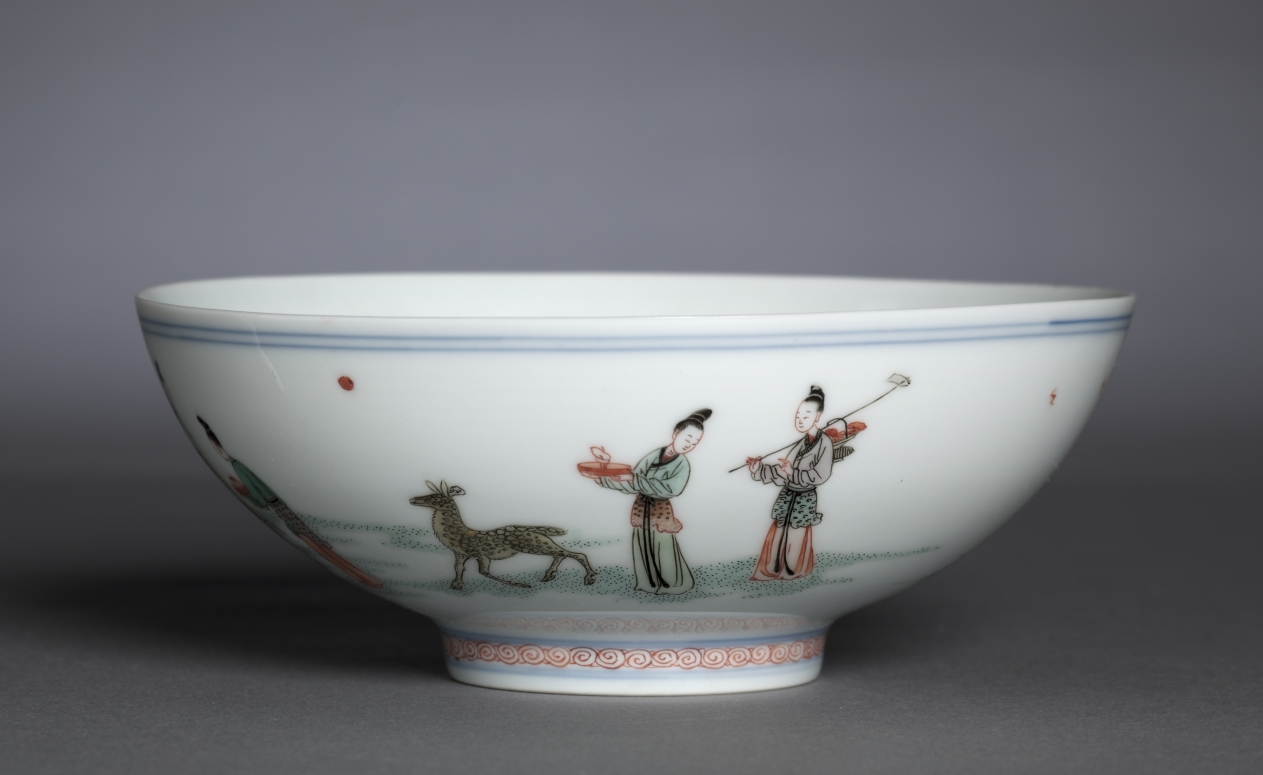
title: Bowl with Xiwangmu and Attendants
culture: China, Jiangxi province, Jingdezhen, Qing dynasty (1644-1911), Kangxi reign (1662-1722), but Chenghua mark (1465-87)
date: 1662–1722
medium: porcelain with famille verte overglaze enamel decoration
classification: Ceramic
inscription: 大明成化年製